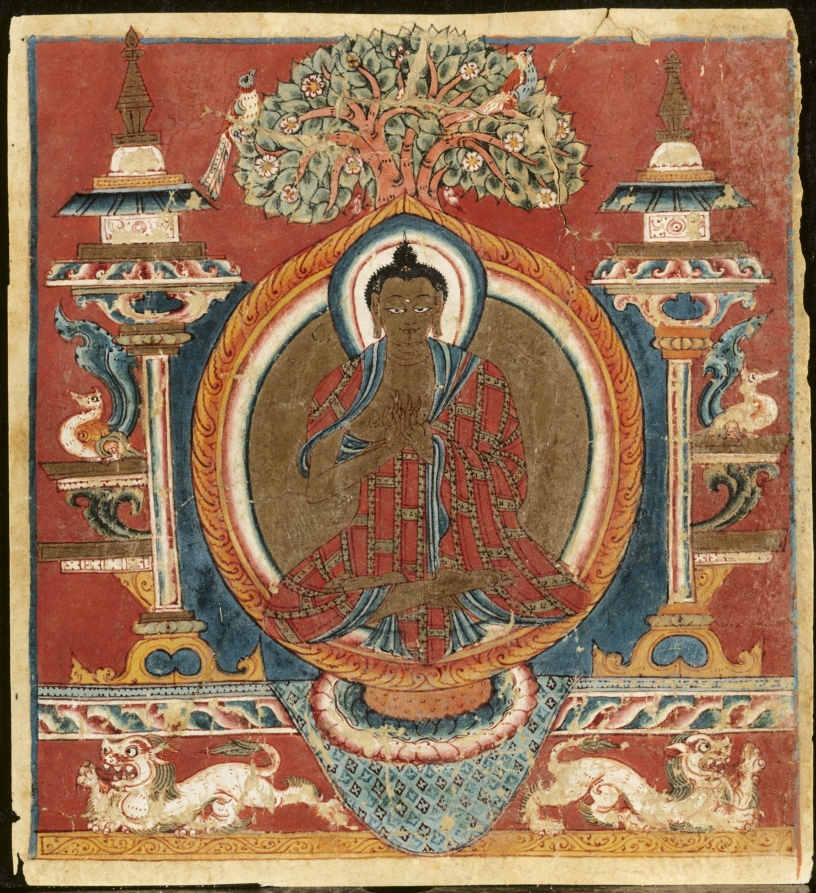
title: Votive initiation card (tsakali) with preaching Buddha Shakyamuni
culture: Western Tibet, Tholing Monastery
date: 1000s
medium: Gum tempera, ink, and gold on paper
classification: Painting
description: Buddhism was introduced to Tibet in the 7th century, but the persecution that followed in the 9th and 10th centuries destroyed all artifacts of the period. Consequently the earliest existing Buddhist art from Tibet dates to the 11th and 12th centuries, the so-called period of the Second Diffusion of Buddhism, yet few 11th- or 12th-century paintings survive. This miniature painting is one of these rare paintings. Not a manuscript illustration, it was conceived as a separate votive painting, a so-called tsa-kali. It was recovered from the Tholing Monastery, which was founded by Rinchensangpo (958-1055), the famous translator of Buddhist scriptures, who acted on the order of Yesheö, the king of Guge. Yesheö was also the father of "Lhatsun Nagaraja" (active 998-1026) whose name is inscribed on the museum's early Himalayan bronze statue of a Standing Buddha (1966.30)—one of the most important and beautiful Himalayan bronzes to survive. The museum's collection includes another important sculpture from the western Himalayas: the colorful wooden sculpture of a Seated Buddha (1986.6). The two sculptures date from the 11th century and provide a meaningful comparison with this painting, which replicates their style.